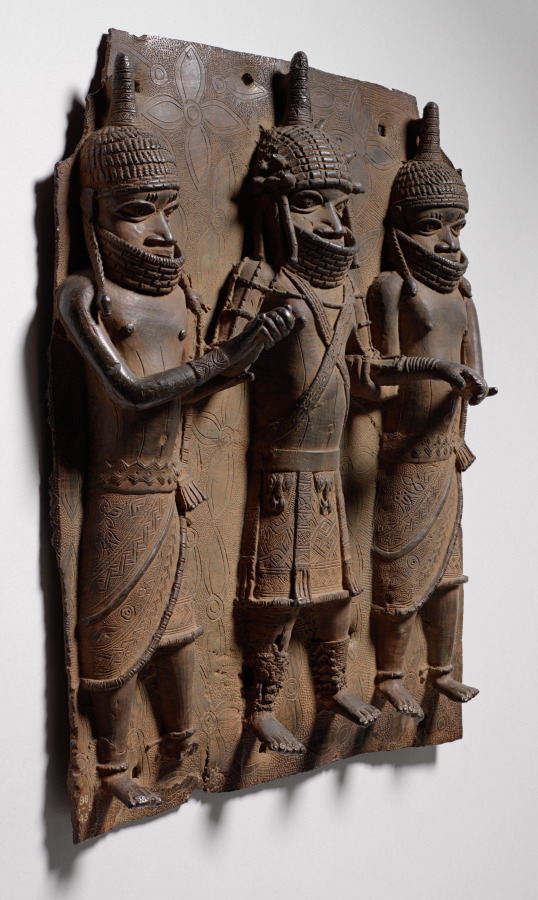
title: Plaque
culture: Nigeria, Benin Kingdom, Ẹdo peoples, members of the Igun Eronmwon (royal brasscasters) guild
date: 1500s–1600s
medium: Copper alloy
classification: Sculpture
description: Nearly 900 metal plaques once adorned the Ọba’s palace courtyard, documenting Benin’s history and customs. This one depicts two male attendants (enobore) supporting an Ọba. It uses hierarchical composition: important figures are large and centered. Everything about the Ọba is greater than his companions: their bodies, clothing, and jewelry. The flanking attendants physically support a man weighed down by heavy royal garments and responsibilities. Brasscasters skillfully cast their clasping hands projecting from the plaque. The bottom left number means the British Museum formerly owned this. It entered their collection in 1898, one year after British troops took it from a palace storeroom during the Siege of Benin.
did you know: Look at the side of this plaque. The designs on the slender edges are considered visual "signatures" of the different casters who made plaques for the Oba of Benin.